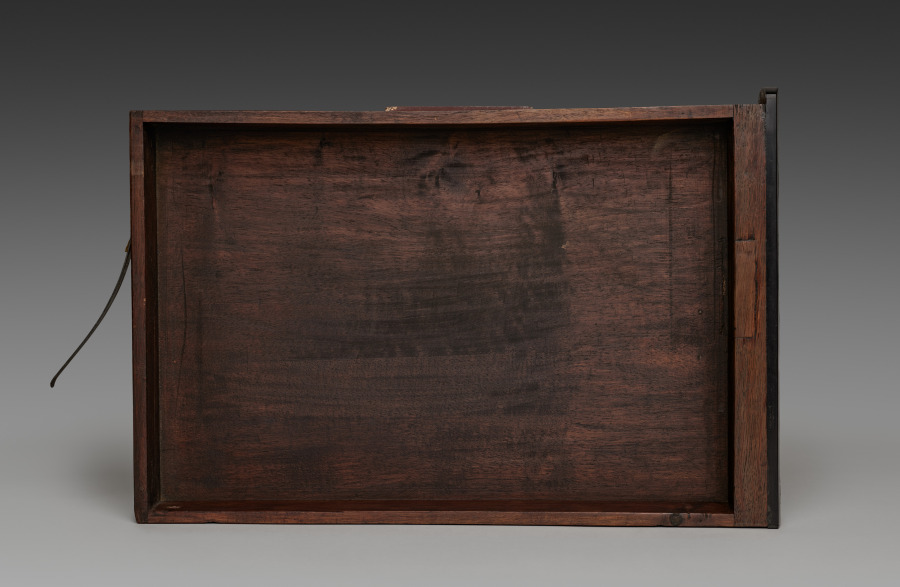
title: Drawer for Cabinet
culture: France, late 17th Century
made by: André-Charles Boulle (French, 1642–1732)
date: c. 1690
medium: ebony, marquetry in metal and tortoiseshell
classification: Furniture and woodwork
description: Appointed cabinetmaker to King Louis XIV in 1672, André-Charles Boulle became a master of furniture making in France during the late 1600s until his death in 1732. Known primarily for his use of marquetry, in which metal patterns are inlaid into tortoiseshell then applied within the veneered surface of the furniture, Boulle established a level of quality and craftsmanship few others could achieve. As a result, his work found favor at the royal court and among other aristocrats and diplomats eager to impress the king. The inclusion of a medallion depicting Louis XIV within the bronze decoration of this chest would have identified the owner with the royal court. Often exhibiting stout architectural proportions with elegant groups of inlaid motifs such as the parrot on the central panel of this chest, Boulle’s designs are an example of the intellectual fashion for contrasting ideas, materials, and motifs.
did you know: Originally designed to sit atop an elaborate tall stand, this chest was likely altered in the late 1700s to reduce its scale and height.